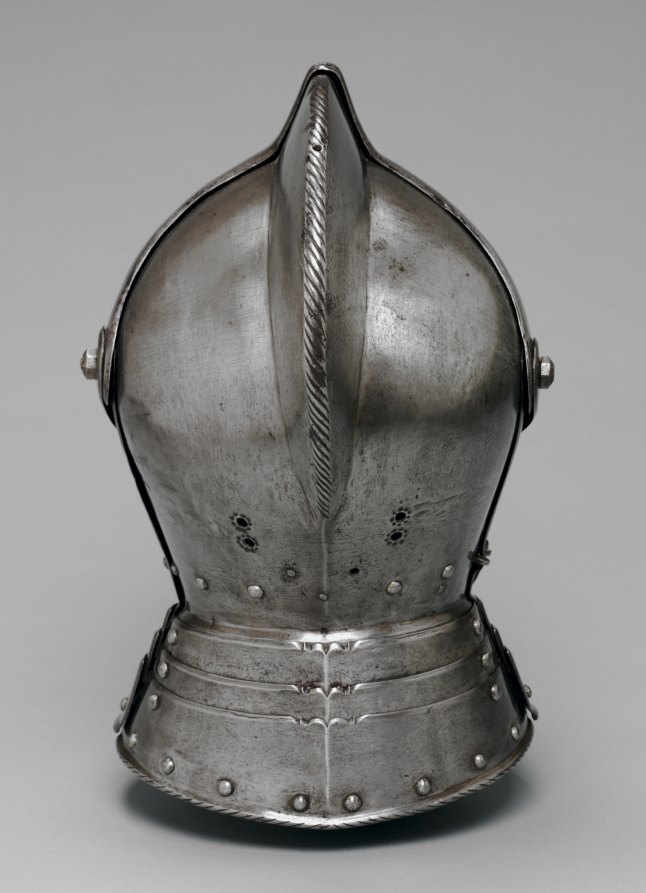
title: Helmet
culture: Germany, Saxony, 16th century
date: c. 1560–80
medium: steel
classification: Arms and Armor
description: This helmet was developed for the joust, a sporting combat of arms between two mounted contestants. This example shows the asymmetry of jousting armor. The participants rode along a wall-like barrier known as a "tilt" with their left sides facing. Consequently, armor on that side of the body tended to be thicker. The breath holes in the helmet were placed on the right side (farthest from an opponent's lance) to avoid injuries from splinters. The popularity of jousts and tournaments peaked around 1500 and required armor and other sporting equipment adapted for the endlessly varied games. By the reign of Emperor Maximilian I (1493–1519), there were at least 11 different forms of mounted jousts, exclusive of the numerous ceremonial combats on foot using such weapons as swords, halberds, pikes, and throwing axes. Each blow in the contest, especially favored in Germany, was carefully numbered and prescribed by rules.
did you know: Jousting contestants wore armor and charged at each other full speed on horseback, attempting to dismount the other with a lance. Such equipment protected contestants from injury, much like the helmet worn by football players today.